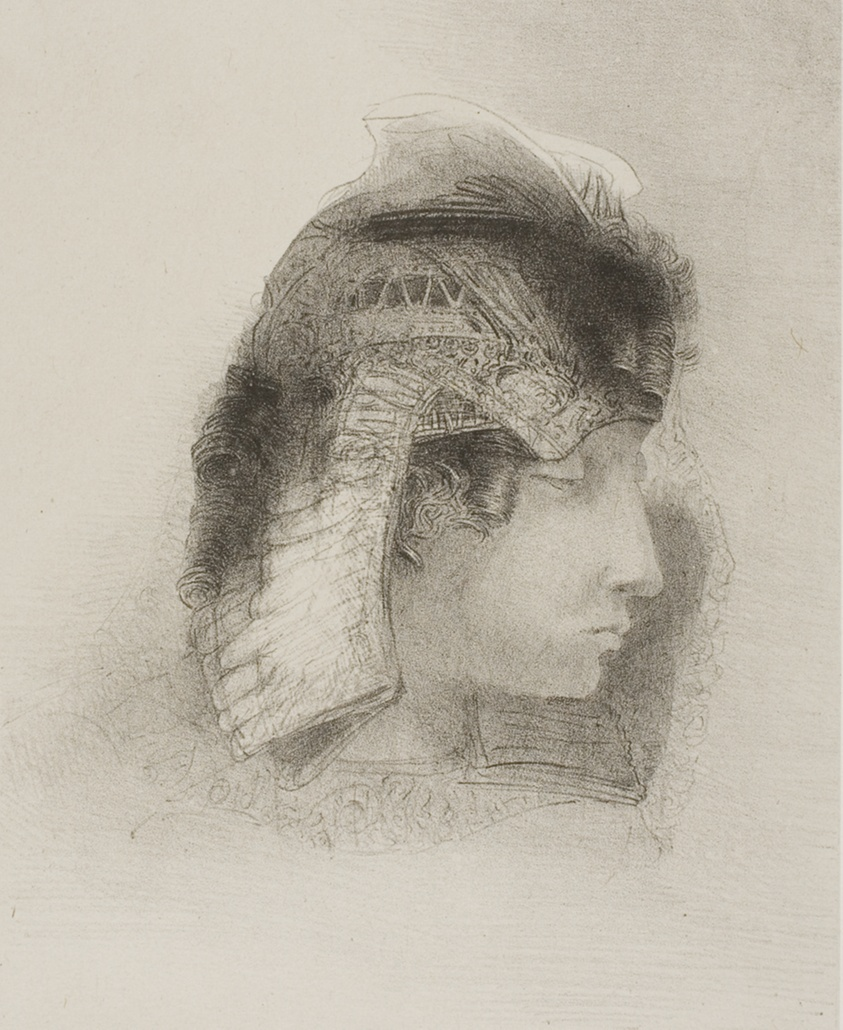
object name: Print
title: My Kisses Have the Taste of Fruit Which Would Melt in Your Heart!...You Disdain Me! Farewell!, plate 4 of 24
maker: Odilon Redon (French, 1840-1916)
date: 1896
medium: Lithograph in black on gray China paper laid down on ivory wove paper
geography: France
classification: lithograph; print; prints and drawing; paper